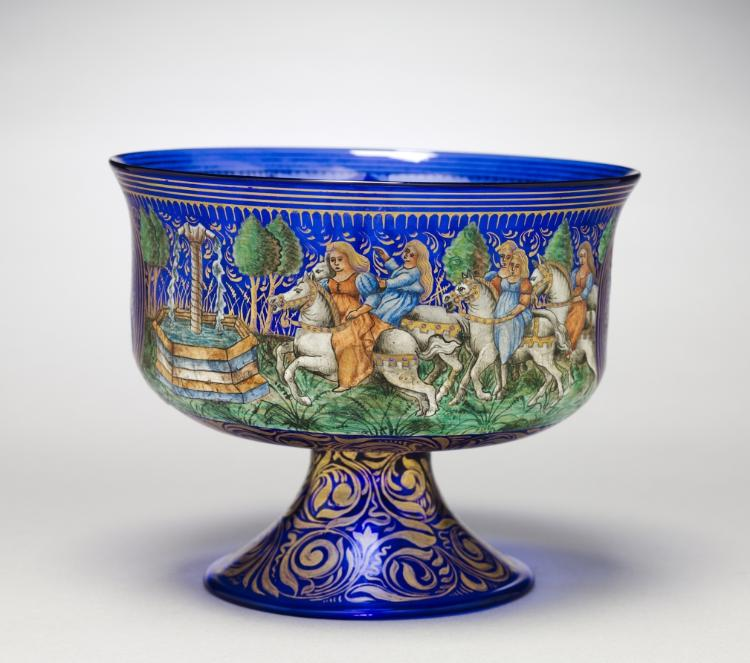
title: Footed Bowl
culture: Italy, Venice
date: 1850–99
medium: glass decorated with polychrome enamel and gilt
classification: Glass